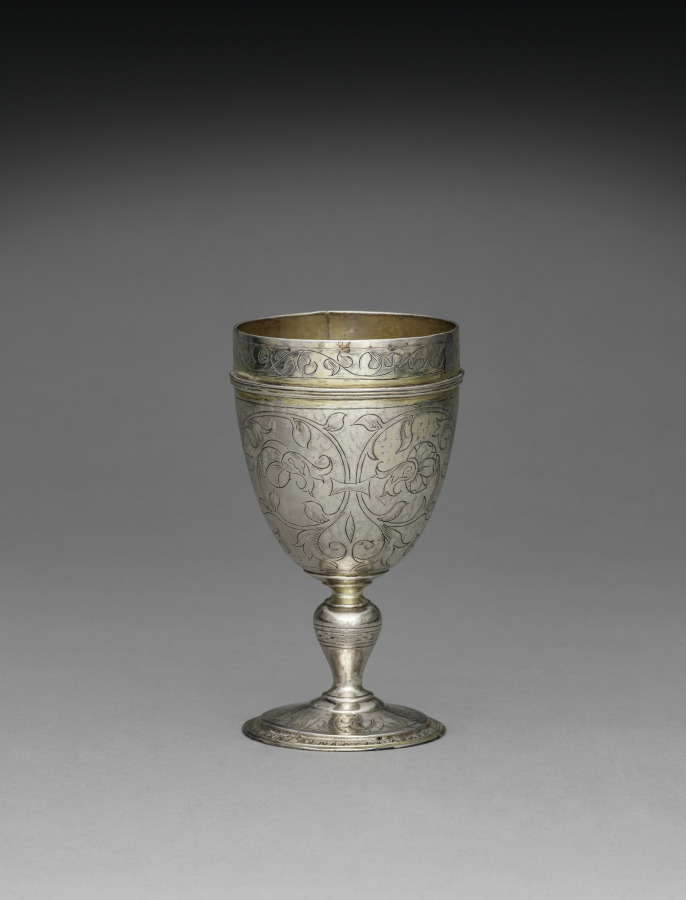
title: Standing Cup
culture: London, England: late 16th century, late 16th century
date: 1593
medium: silver, partially gilt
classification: Silver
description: Produced during the last years of the Tudor dynasty (1485–1603), this vessel exemplifies the symmetrical patterns, horizontal designs, and clear division of space typical of English silverwork at the time. The functional shape and ornamental designs characteristic of standing cups made them ideal for ceremonial occasions.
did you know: This cup has a lid. See cover record.